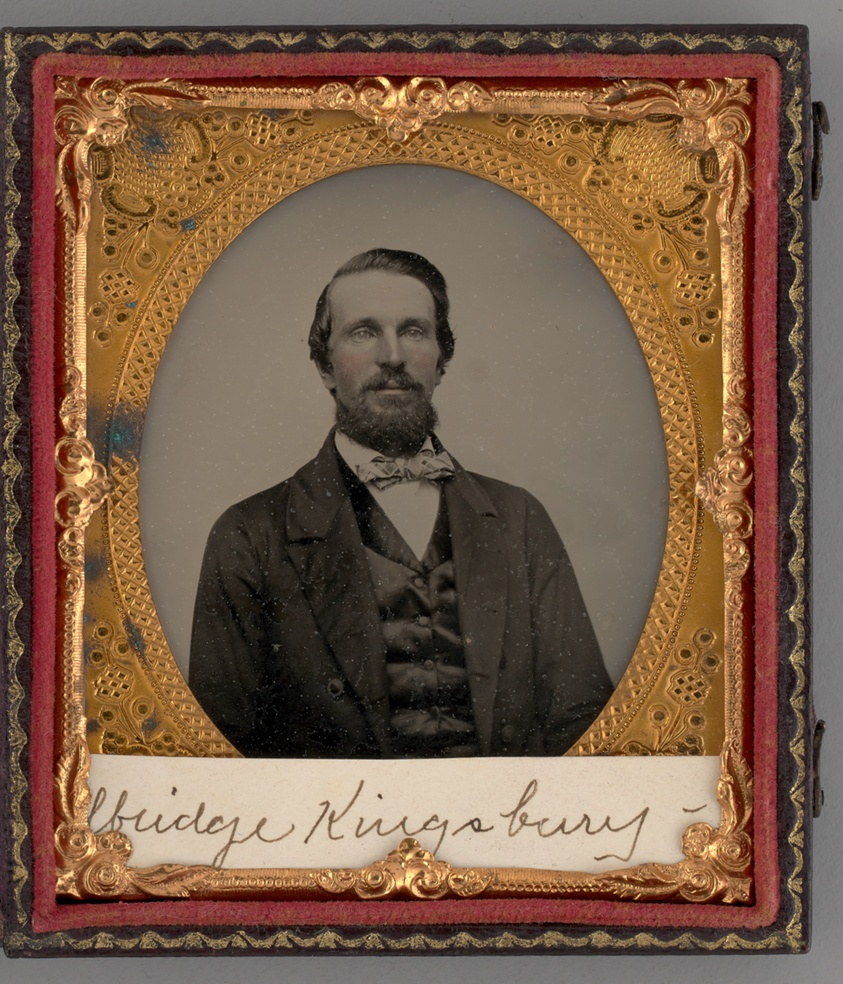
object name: Photograph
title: Untitled (Portrait of Albridge Kingsbury)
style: 19th century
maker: Unknown maker; American, 19th century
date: 1862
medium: Ambrotype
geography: United States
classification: portrait; photograph; photographic process; photography; portrait; ambrotype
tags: lundberg collection, portraits, Male, portraits: male subject